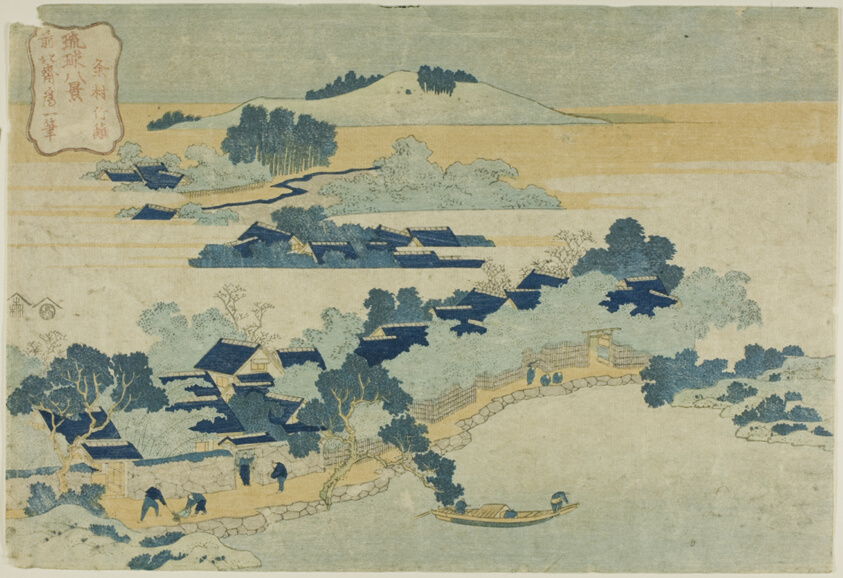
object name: Print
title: Bamboo Grove at Kume Village (Kumemura no chikuri), from the series “Eight Views of Ryukyu Islands (Ryukyu hakkei)”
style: Japanese (culture or style)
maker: Katsushika Hokusai 葛飾 北斎; Japanese, 1760–1849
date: 1832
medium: Color woodblock print; oban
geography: Japan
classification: woodblock print; print